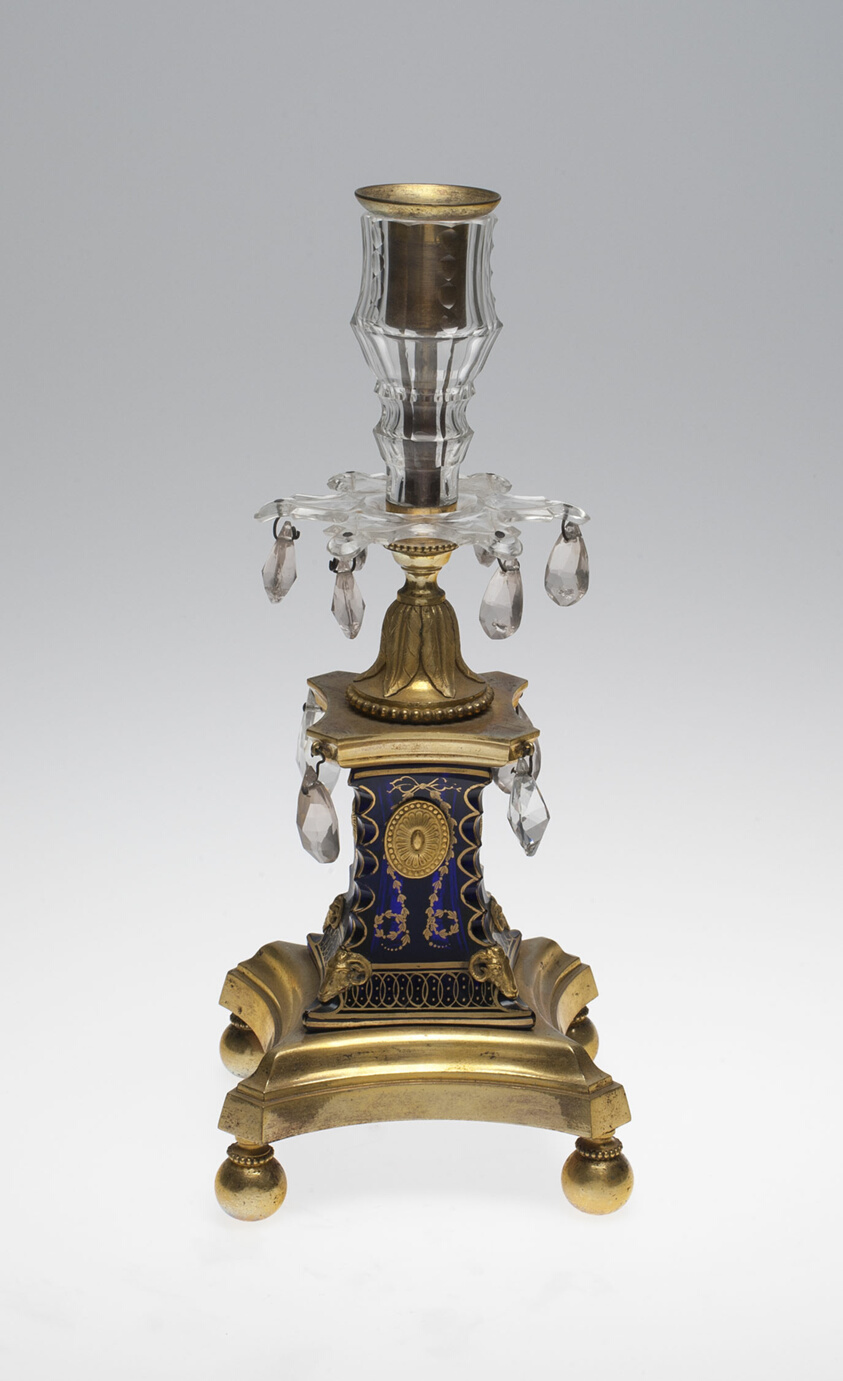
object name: Glass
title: Candelabra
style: Neoclassicism, european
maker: England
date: 1780/1800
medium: Clear and blue glass, gilding and bronze mounts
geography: England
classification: candleholder - candlestick; candleholder; bronze; metalwork; european decorative arts; glass